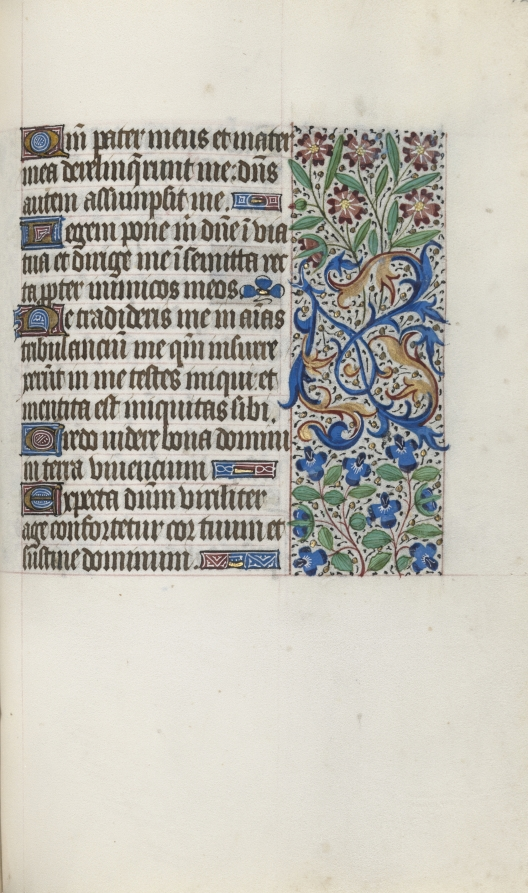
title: Book of Hours (Use of Rouen): fol. 122r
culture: France, Rouen, 15th century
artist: Master of the Geneva Latini (French, active Rouen, 1460–80)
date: c. 1470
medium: ink, tempera, and gold on vellum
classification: Bound Volume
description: In the late 1400s and early 1500s Rouen was an established and important center of book production. The city’s cathedral had a wealthy chapter that spent large sums of money to commission books and to maintain its extensive library. The stationers and booksellers would have likely been concentrated in or near the cathedral precinct. This artist, named after a manuscript now in Geneva, was Rouen’s principal illuminator during the second half of the 1400s.